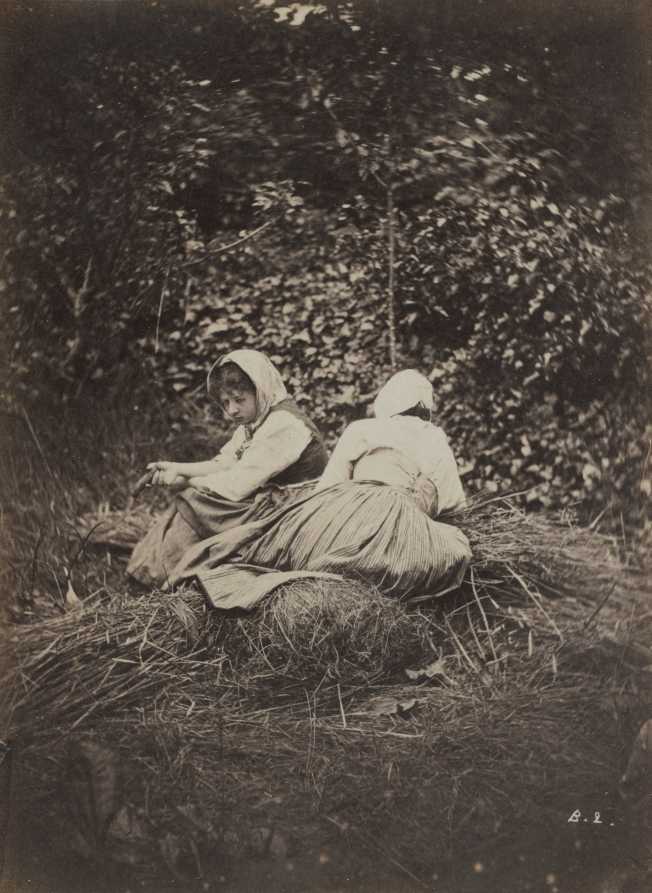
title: Two Peasant Girls Seated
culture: France, 19th century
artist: Auguste Giraudon's Artist (French)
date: 1870s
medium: albumen print from wet collodion negative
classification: Photograph